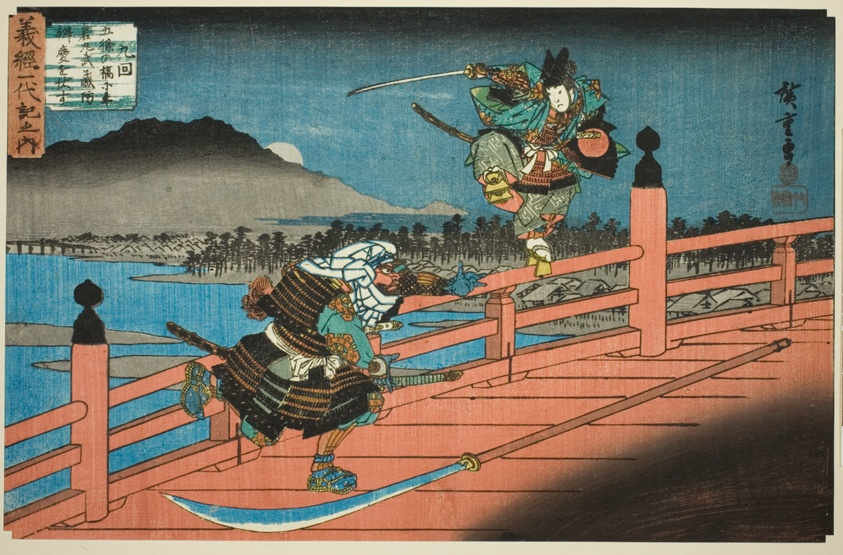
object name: Print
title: No. 9: Ushiwakamaru Defeats Musashibo Benkei at Gojo Bridge (Kyukai, Gojo no hashi ni Ushiwakamaru Musashibo Benkei o fusu), from the series "The Life of Yoshitsune (Yoshitsune ichidaiki no uchi)"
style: Japanese (culture or style)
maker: Utagawa Hiroshige 歌川 広重; Japanese, 1797-1858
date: c. 1832/34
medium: Color woodblock print; oban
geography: Japan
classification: woodblock print; print; asian art